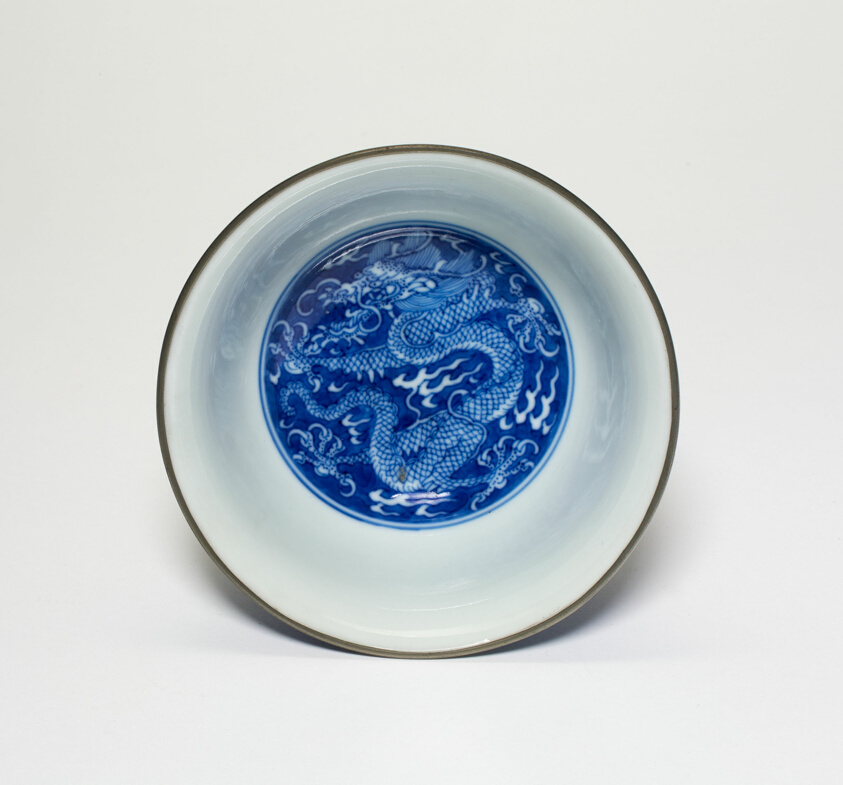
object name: Vessel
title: Bowl with Dragons Chasing Flaming Pearls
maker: China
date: Qing dynasty (1644–1911), Qianlong reign mark and period (1736–1795)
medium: Porcelain painted in underglaze blue with metal rim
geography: China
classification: porcelain; asian art; ceramics